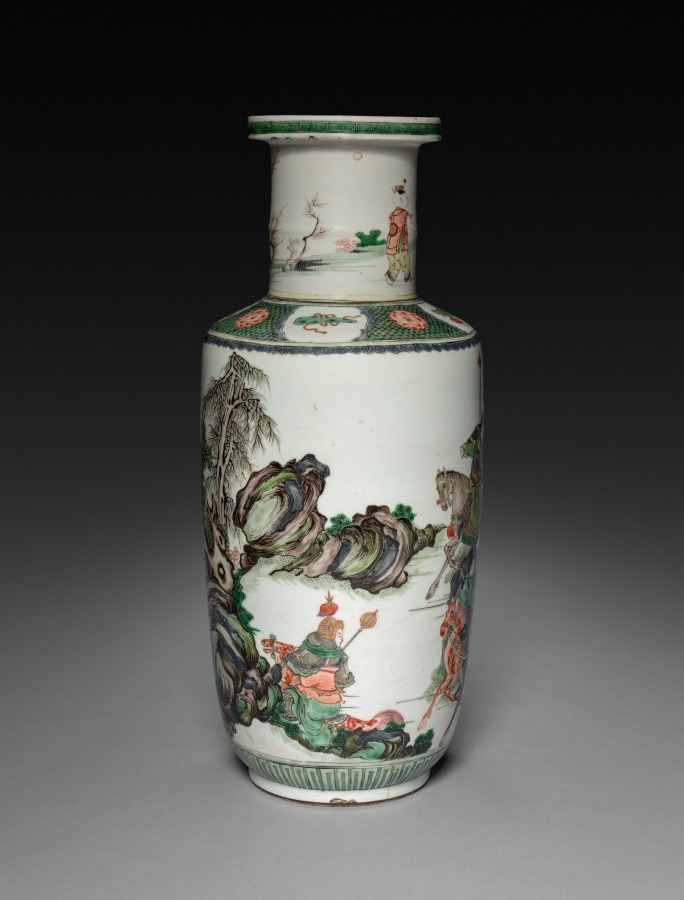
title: Vase with Decoration of Figures in Chariots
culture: China, Qing dynasty (1644-1911), Kangxi reign (1662-1722)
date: 1622–1722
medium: porcelain with famille verte overglaze enamel decoration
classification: Ceramic